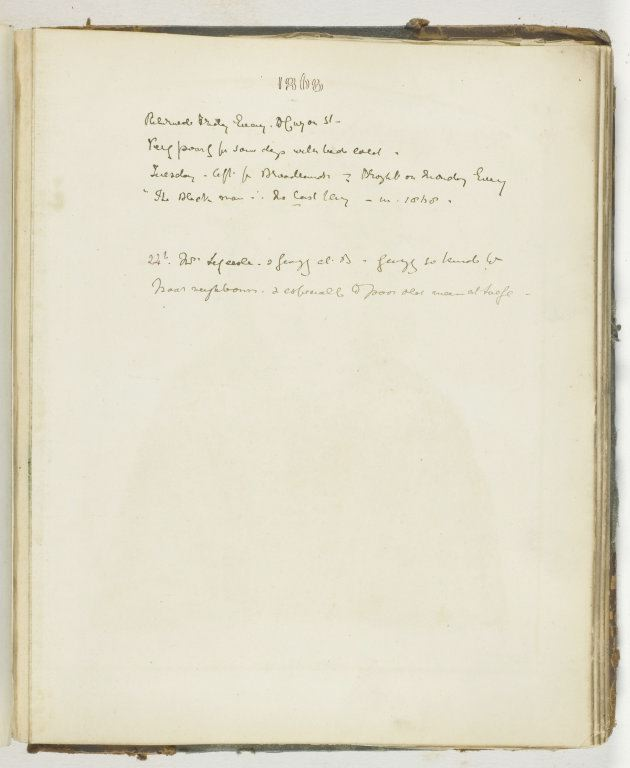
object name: Photograph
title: Untitled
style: 19th century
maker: Georgina Cowper, attributed; English, mid 19th century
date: 1855/68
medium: Ink on paper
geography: England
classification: photograph; photography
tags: Collected by Hugh Edwards, Untitled Album 1849-60, Auld Lang Syne